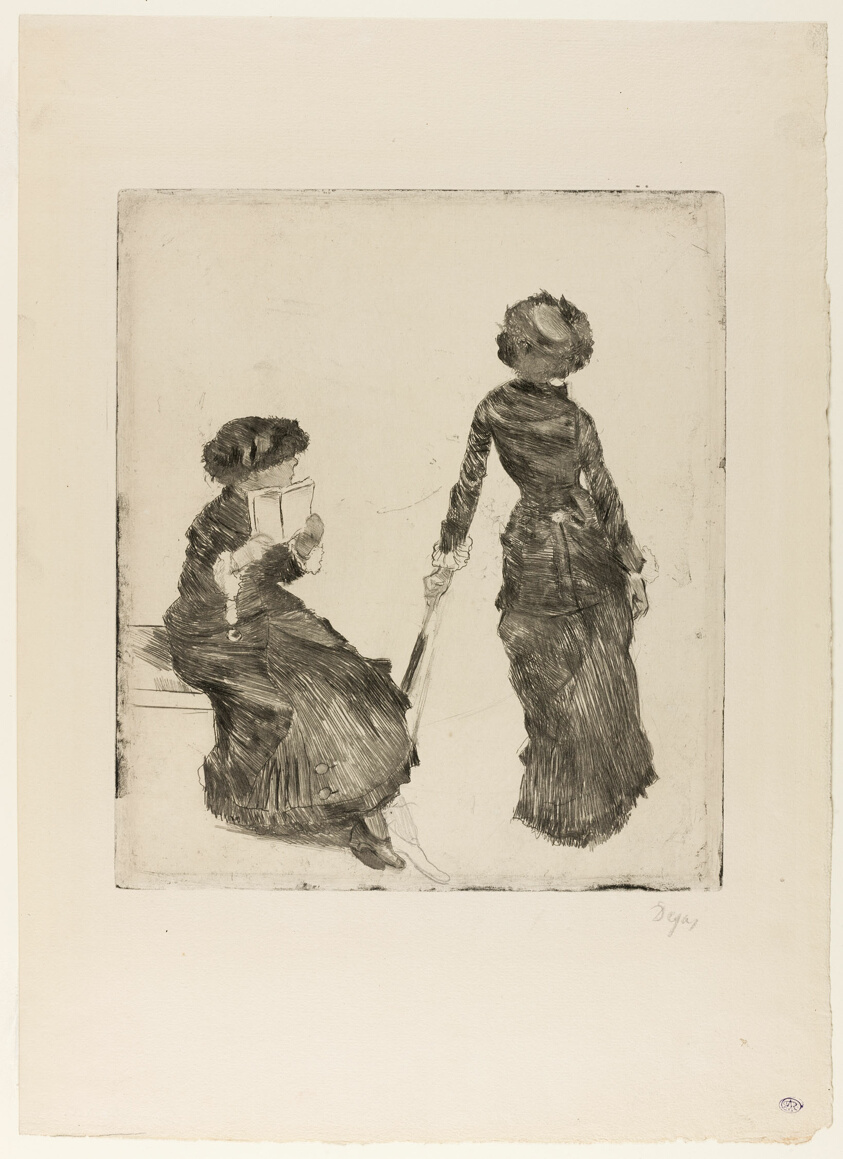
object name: Print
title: Mary Cassatt at the Louvre: The Etruscan Gallery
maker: Edgar Degas; French, 1834-1917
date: 1879–80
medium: Soft ground etching, drypoint, aquatint, and etching on buff laid paper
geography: France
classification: etching; print; prints and drawing; paper